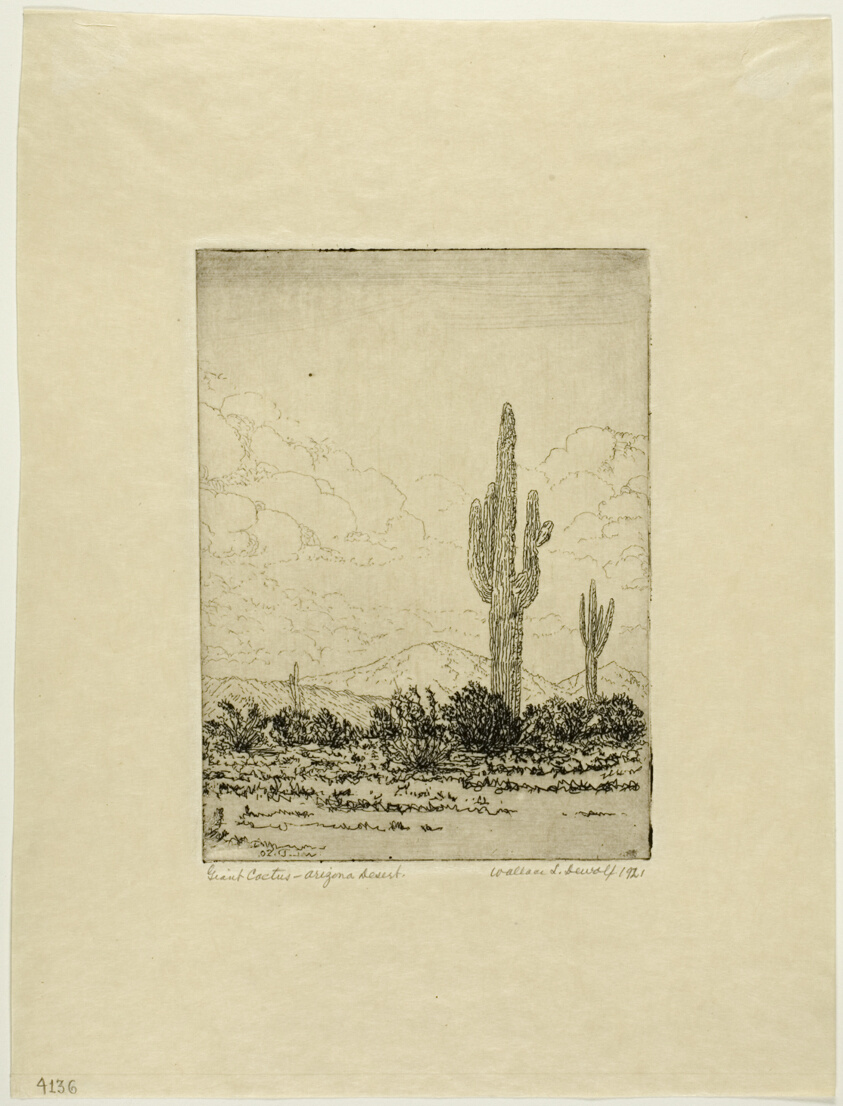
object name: Print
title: Giant Cactus, Arizona Desert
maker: Wallace L. DeWolf (American, 1854-1930)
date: 1920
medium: Etching on cream wove paper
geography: United States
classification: etching; print; prints and drawing